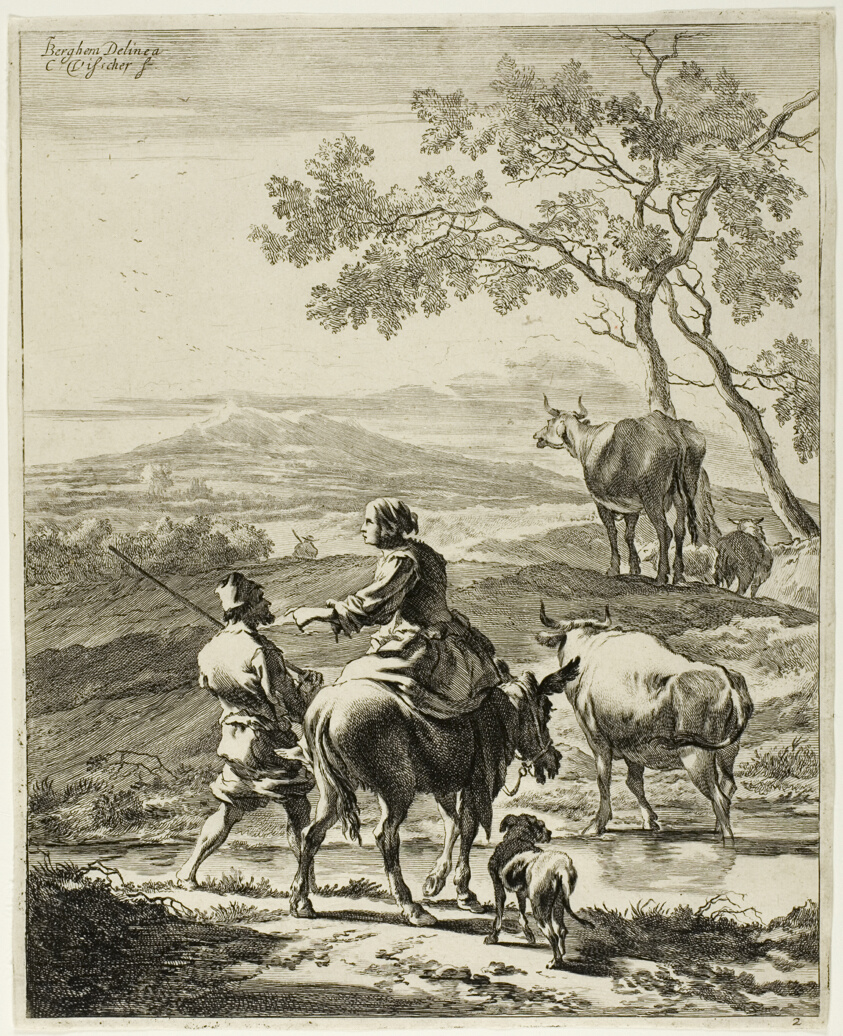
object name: Print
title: Shepherdess Riding on a Donkey, plate 2 from Four Landscapes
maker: Cornelis Visscher (Dutch, c. 1629-1658); after Nicolaes Berchem (Dutch, 1620-1683)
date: c. 1649-58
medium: Etching and ngraving on paper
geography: Holland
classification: engraving; print; prints and drawing